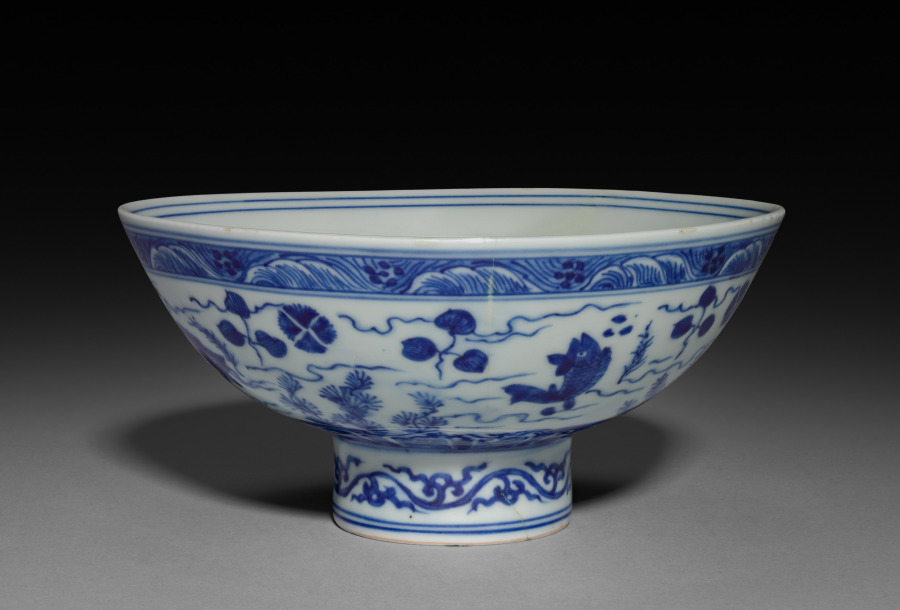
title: Bowl with Fish and Water Plants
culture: China, Jiangxi province, Jingdezhen kilns, Ming dynasty (1368-1644), Jiajing mark and reign (1522-66)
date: 1522–66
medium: porcelain with underglaze blue decoration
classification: Ceramic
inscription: 大明嘉靖年製